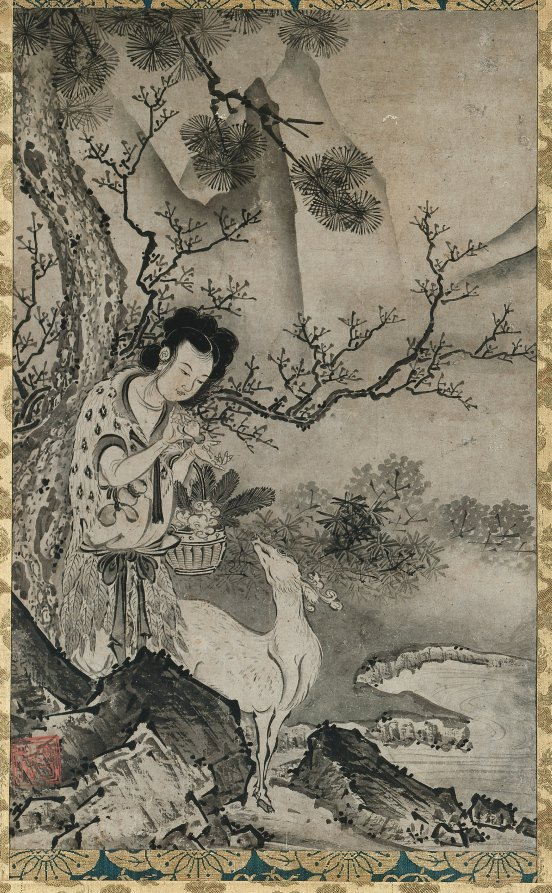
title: Female Daoist Figure in Landscape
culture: Japan, Muromachi period (1392–1573)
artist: Kōboku (Japanese)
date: early 1500s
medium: hanging scroll; ink on paper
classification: Painting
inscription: 「興牧」（朱文方印）